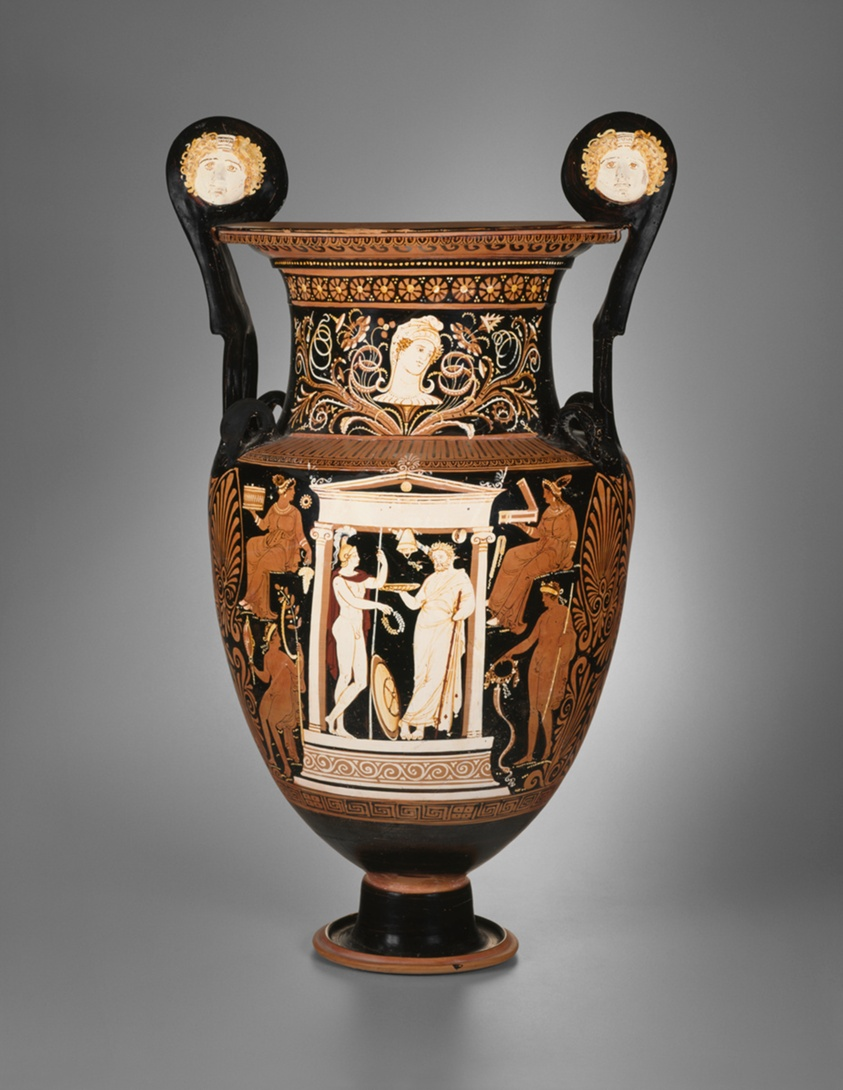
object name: Funerary Object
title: Volute Krater (Mixing Bowl)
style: red-figure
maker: Attributed to the Painter of Copenhagen 4223; Greek; Apulia, Italy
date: About 340 BCE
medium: terracotta, red-figure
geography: Apulia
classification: vessel; earthenware; ceramics; ancient art